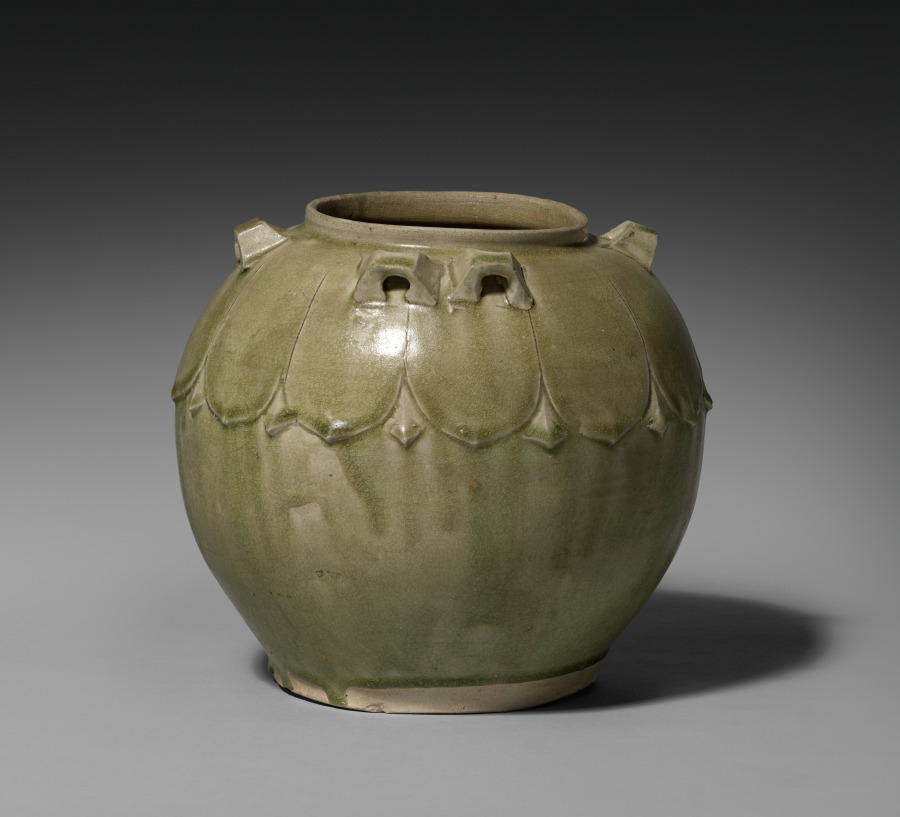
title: Covered Jar with Carved Lotus Petals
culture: China, Northern Dynasties period (386-581)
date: 386–581 CE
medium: Glazed stoneware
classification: Ceramic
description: This jar still has its original cover, which is rare among surviving examples. Its missing knob most likely had the shape of a lotus bud. Beautifully carved lotus petals cover the vessel’s shoulder and lid under a translucent green glaze. In Buddhism, the lotus is a flower symbolizing purity and detachment from worldly affairs; its presence suggests that this vessel was meant to be used in a religious context. The well-crafted double loop handles may have held a silk cloth or other textile that would have been folded over the lid to keep it in place. This aesthetic prefigures the celebrated green celadons in adjacent regions.